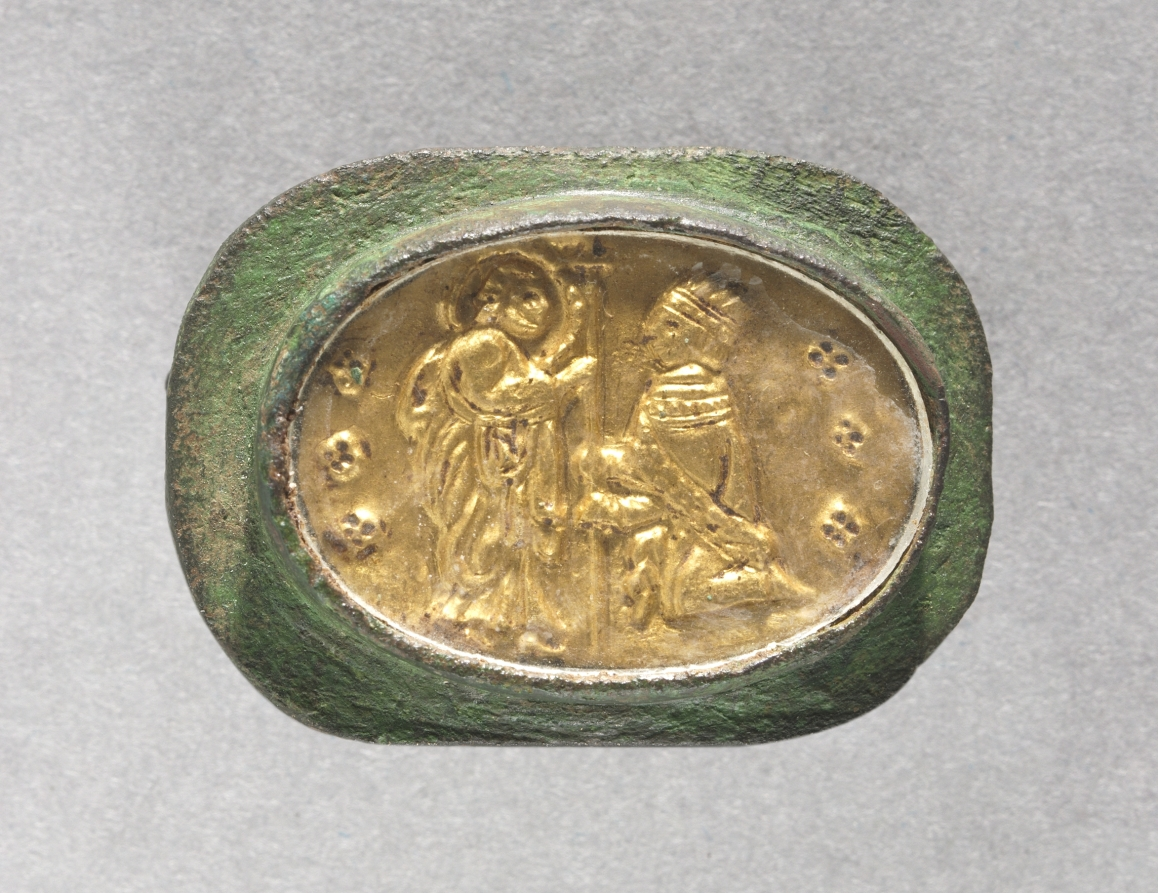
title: Votive or Civic Badge with a Crowned Figure Kneeling before Christ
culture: Italy, Venice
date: c. 1300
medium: gold repoussé medallion under glass inset within a bronze clasp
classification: Metalwork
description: This brooch was probably made to fasten a ceremonial cloak, and may have been intended as a diplomatic gift or memento. The central composition parallels the main face of the famous gold coin, a ducat, of the Venetian Doge Giovanni Dandolo minted in 1288-1289. Unlike the coin, the medallion is neither struck or diecast; it is tooled and chased, making it one of a kind.